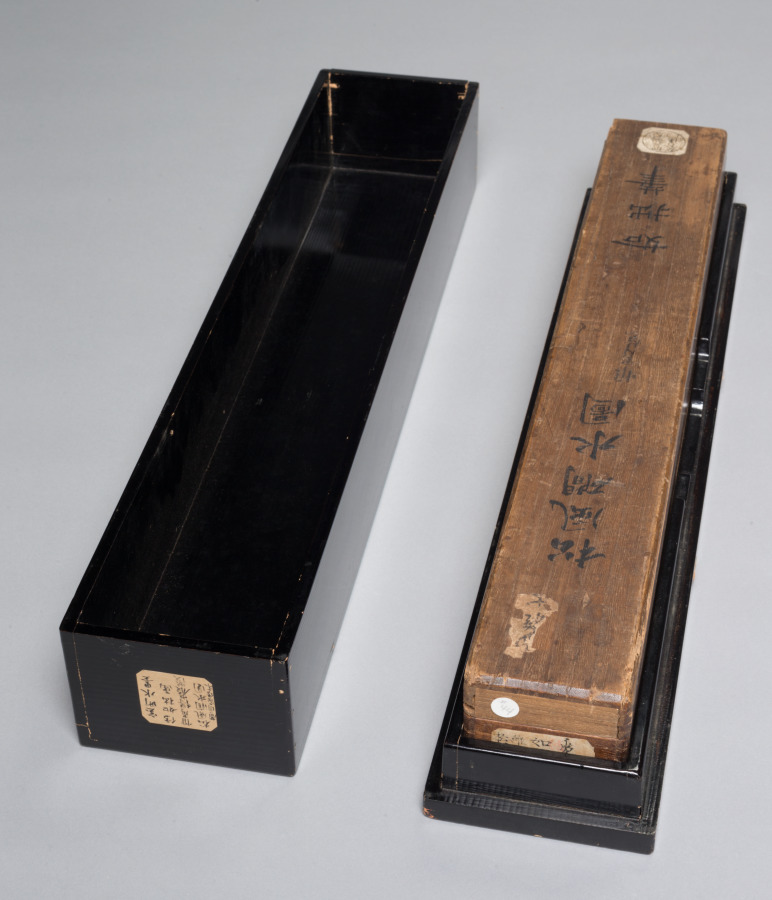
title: Landscape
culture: Japan, possibly Edo period (1615-1868)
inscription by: copy after Ishō Tokugan (Japanese, c. 1359–1437)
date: early 1600s to mid-1800s?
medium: hanging scroll; ink and slight color on paper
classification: Painting